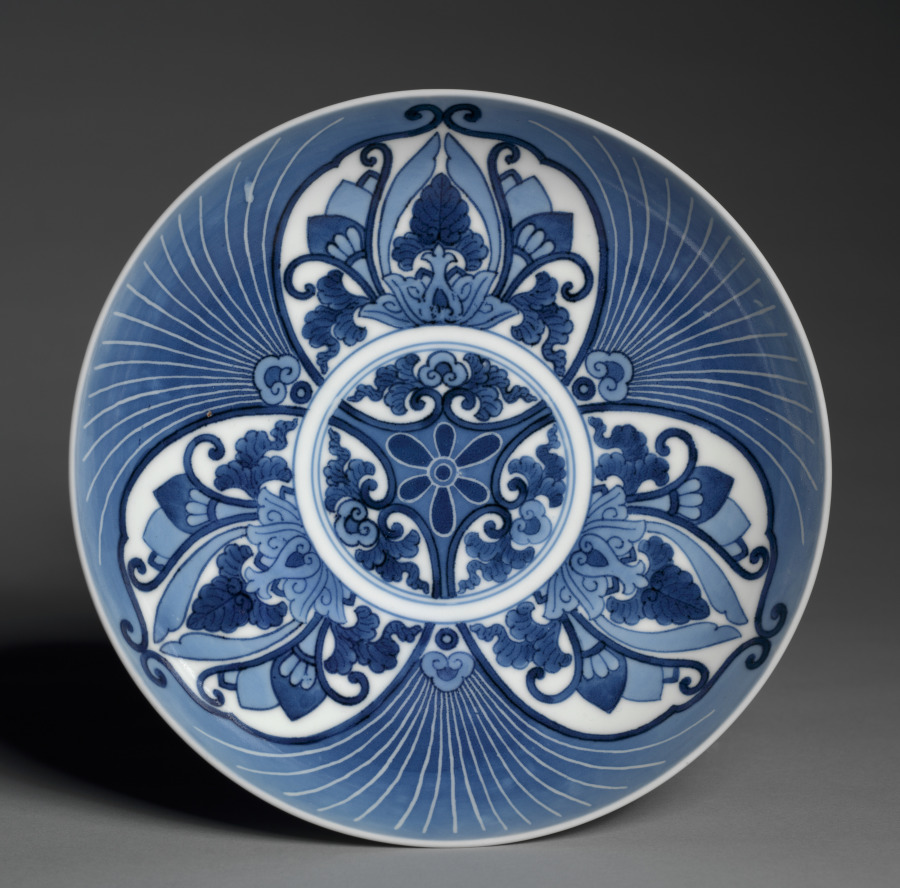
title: Dish with Ginkgo Leaves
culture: Japan, Edo period (1615–1868)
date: late 1600s–early 1700s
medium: Porcelain with underglaze blue (Hizen ware, Nabeshima type)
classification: Ceramic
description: This dish is an example of the finest type of Japanese porcelain, Nabeshima-type Hizen ware. It has a complex, abstracted design of ginkgo leaves and “Chinese grasses” (karakusa) in underglaze blue that may be among the most interesting of the underglaze blue designs. The dish is the largest of the three standard-sized Nabeshima dishes for individual servings.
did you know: The ginkgo's distinctive fan-shaped leaf is a symbol of longevity and endurance in Japanese art.